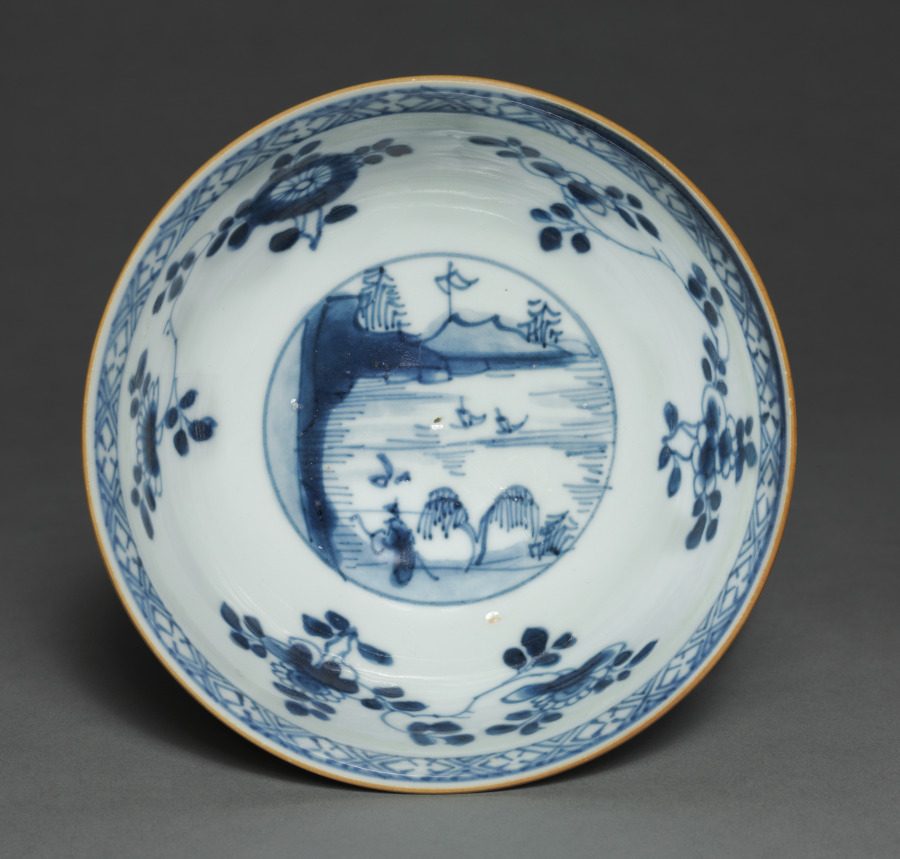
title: Bowl with Floral Sprays and Medallions with Figure in Landscape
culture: China, Jiangxi province, Jingdezhen kilns, Qing dynasty (1644-1911), Yongzheng mark and reign (1723-35)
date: 1723–35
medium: porcelain with underglaze blue decoration (interior) and café-au-lait glaze (exterior)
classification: Ceramic